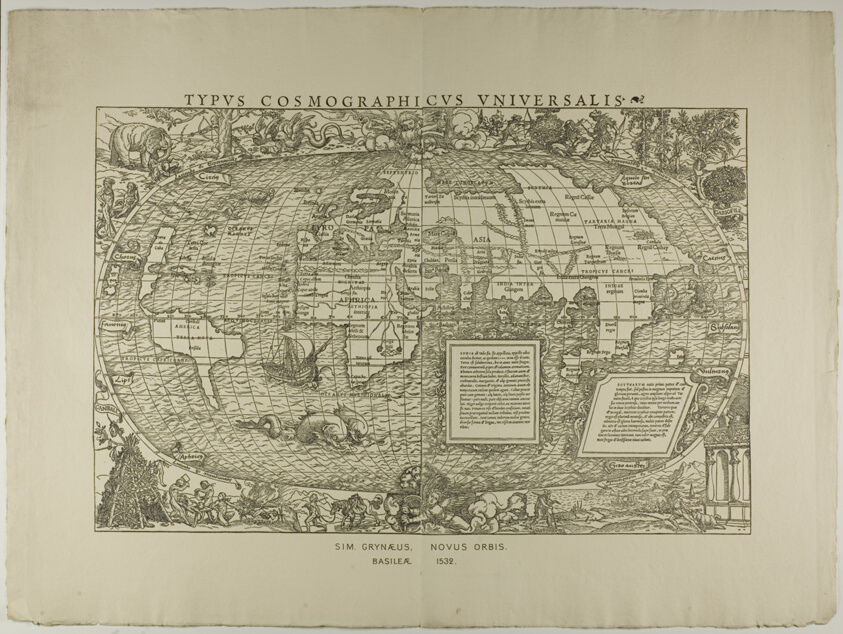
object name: Print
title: Typus Cosmographicus Universalis, Sim. Grynaeus, Novus Orbis, Basileae 1532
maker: Unknown Artist (English, 19th century); after Hans Holbein, the younger (German, 1497-1543)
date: 1532, reprinted 1889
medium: Woodcut in black on cream laid paper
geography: Germany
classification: reproduction; print; prints and drawing